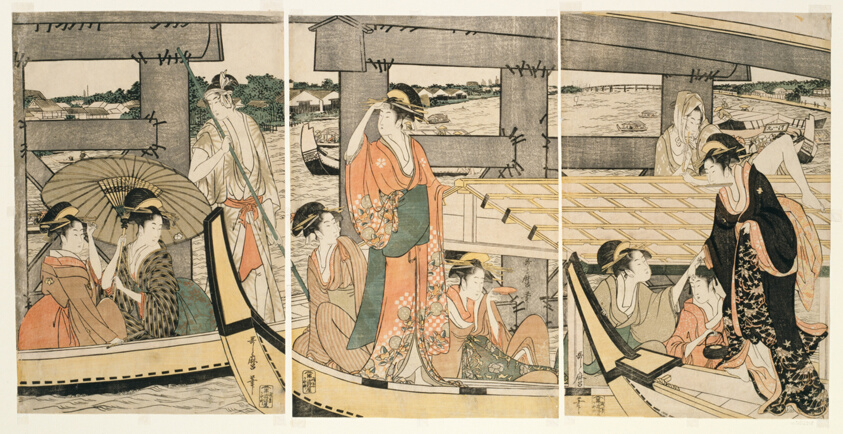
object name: Print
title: On top and beneath Ryogoku Bridge (Ryogokubashi no ue, shita)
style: Japanese (culture or style)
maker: Kitagawa Utamaro 喜多川 歌麿; Japanese, 1753 (?)-1806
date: c. 1795/96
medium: Color woodblock print; oban hexaptych (one of a pair of triptychs)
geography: Japan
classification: woodblock print; print; asian art